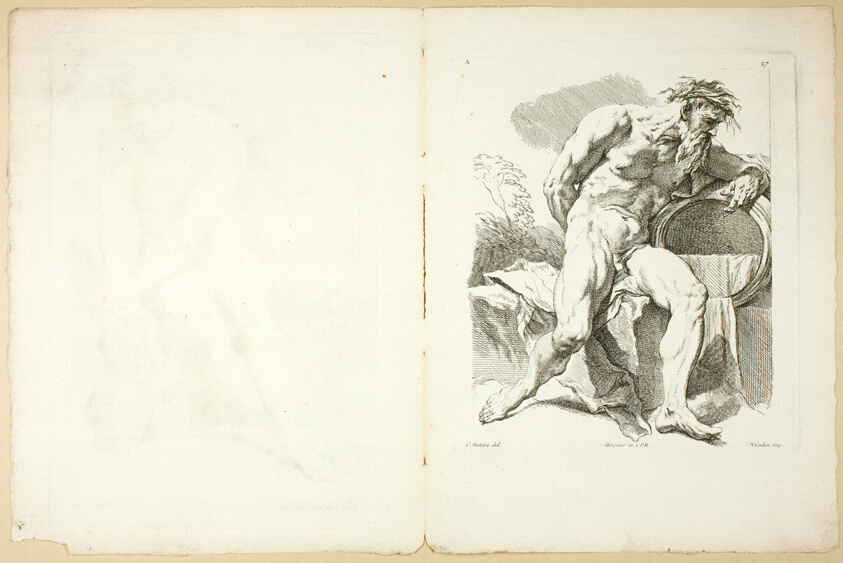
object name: Print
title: Page 26 and Page 27, from Premier Livre de Figures d’Académies Gravées en Partie par les Professeurs de l’Académie Royale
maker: Collin de Vermont (French, 1693-1761); Charles-Nicholas Cochin, the younger (French, 1715-1790); after Charles-Joseph Natoire (French, 1700-1777); printed by Gabriel Huquier (French, 1695-1772); published by Charles-Antoine Jombert (French, 1712-1784)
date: published 1737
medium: Etching on ivory laid paper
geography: France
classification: etching; print; prints and drawing